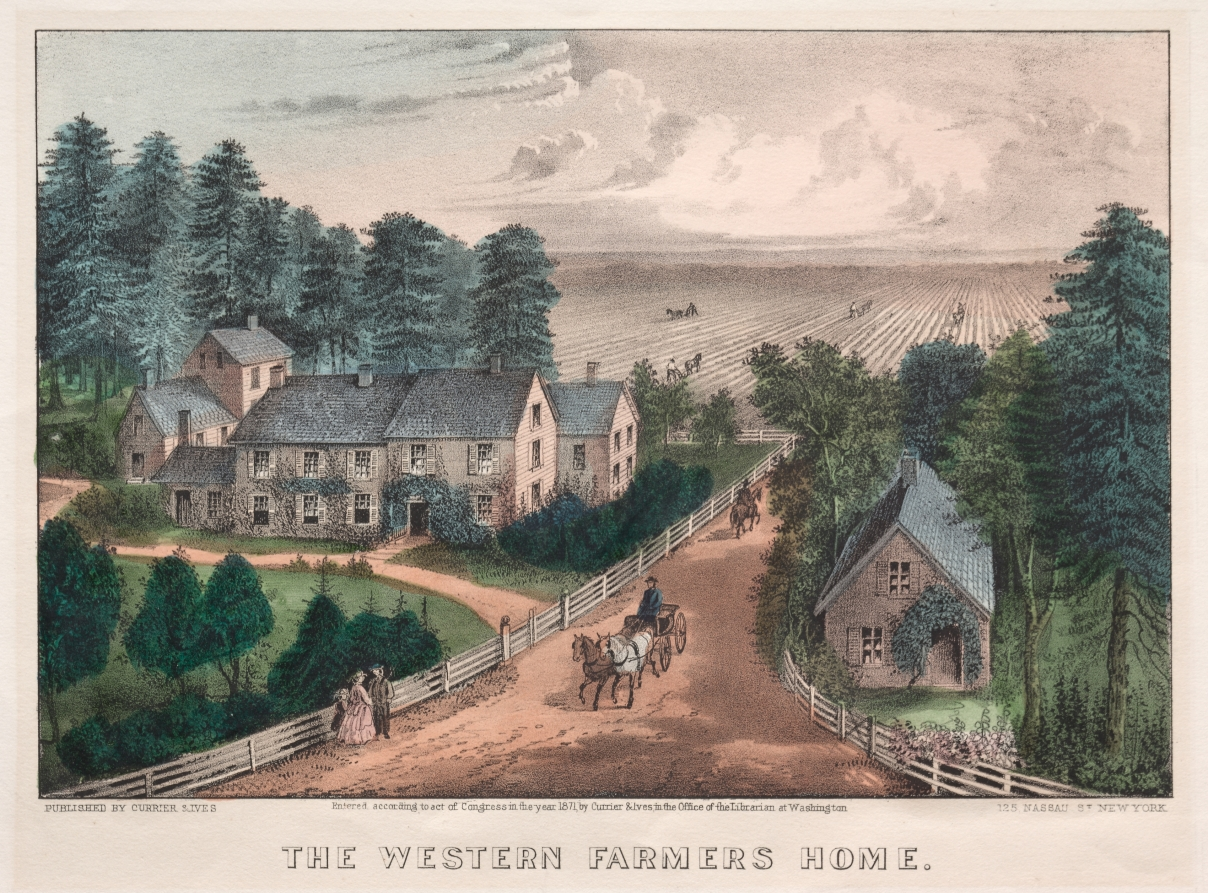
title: The Western Farmer's Home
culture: America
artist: and James Merritt Ives (American, 1824–1895)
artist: Nathaniel Currier (American, 1813–1888)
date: c. 1857–71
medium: lithograph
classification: Print